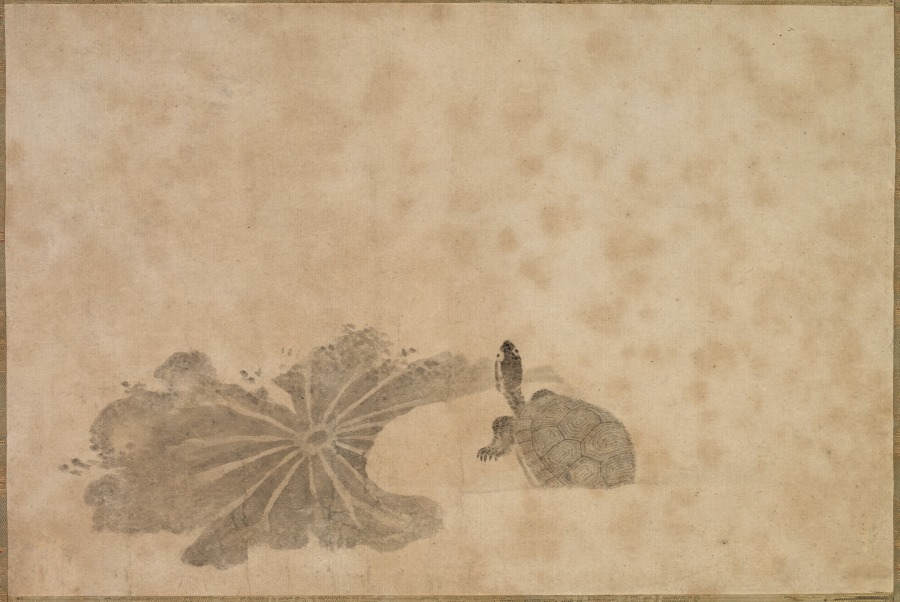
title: Turtle in a Lotus Pond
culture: Japan, Edo period (1615–1868)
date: 1700s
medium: hanging scroll; ink on paper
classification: Painting